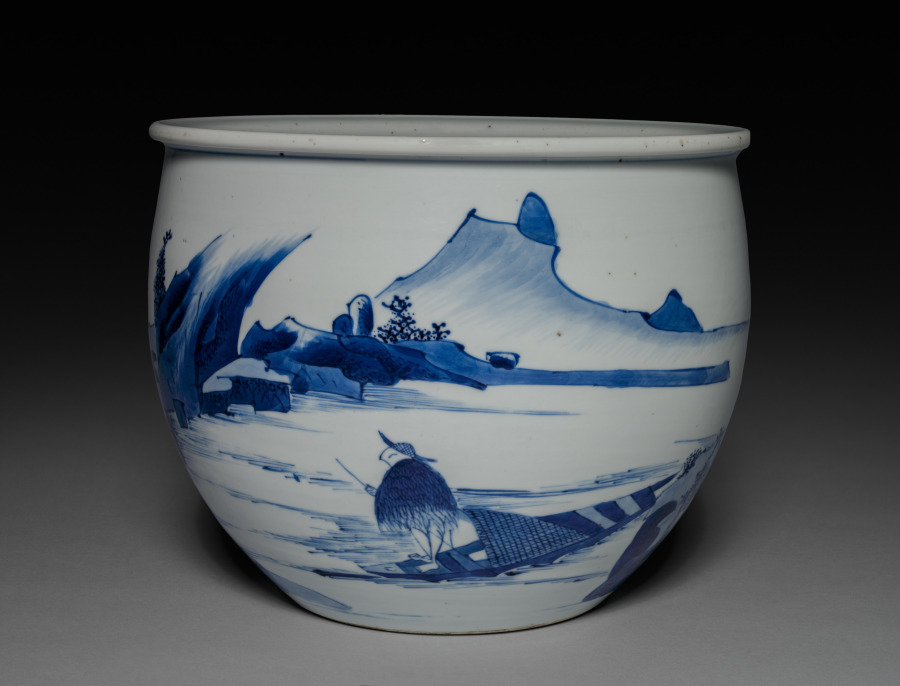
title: Pot with Landscape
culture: China, Jiangxi province, Jingdezhen kilns, Qing dynasty (1644-1911), Kangxi reign (1662-1722)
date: 1662–1722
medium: porcelain with underglaze blue decoration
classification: Ceramic